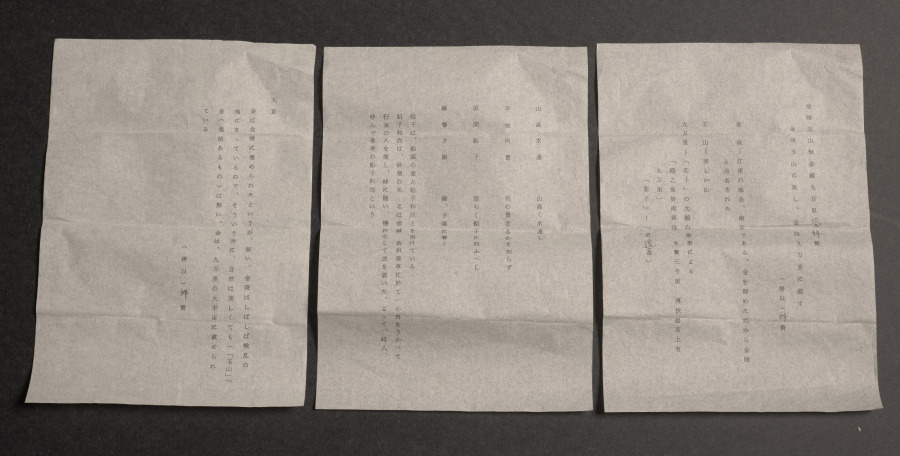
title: Coastal Landscape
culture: Japan, Momoyama period (1573–1615)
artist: Iwasa Matabei (Japanese, 1578–1650)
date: 1573–1615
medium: hanging scroll; ink on paper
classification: Painting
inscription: signed: signature unread